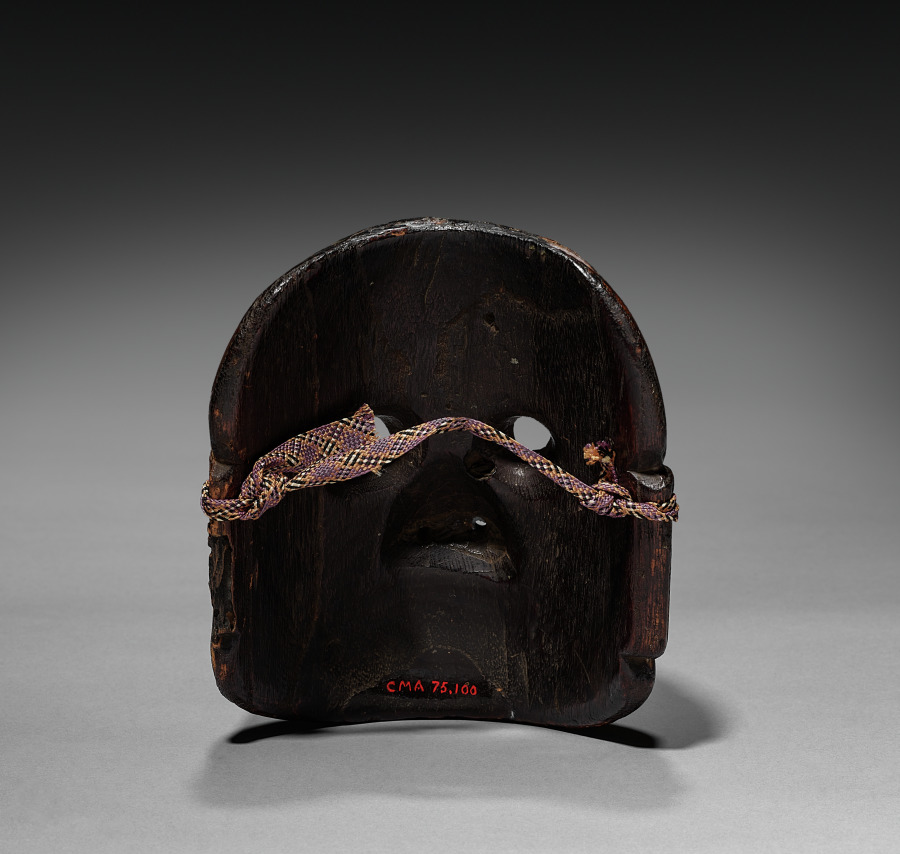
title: Kyogen Mask: Whistler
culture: Japan, Edo period (1615–1868)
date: 1600s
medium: wood with color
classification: Sculpture